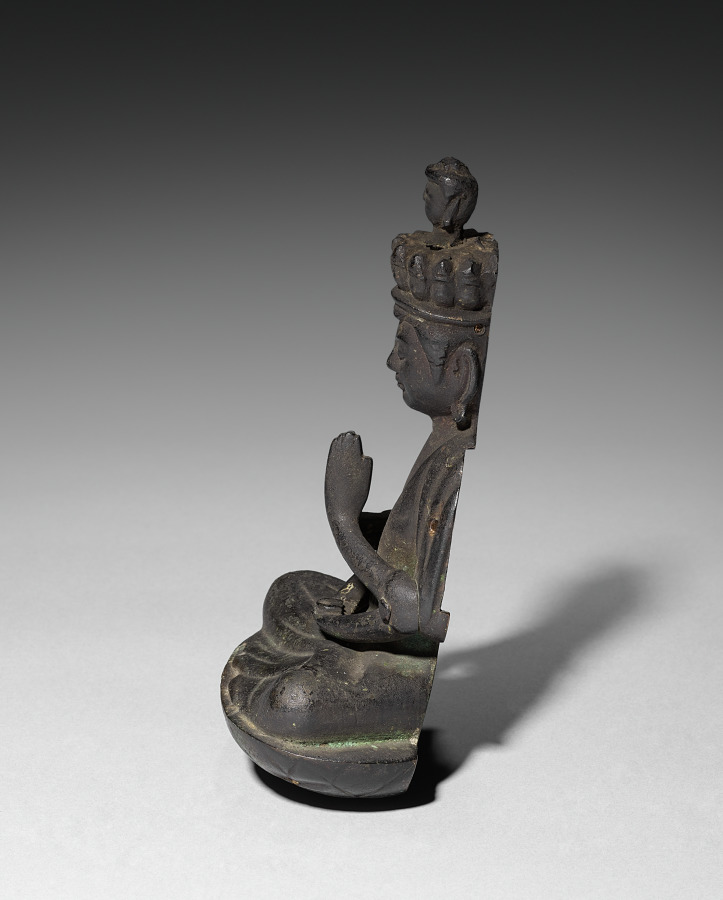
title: Eleven-Headed Kannon (Jūichimen Kannon)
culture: Japan, Heian period (794–1185) to Kamakura period (1185–1333)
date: 1100s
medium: bronze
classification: Sculpture